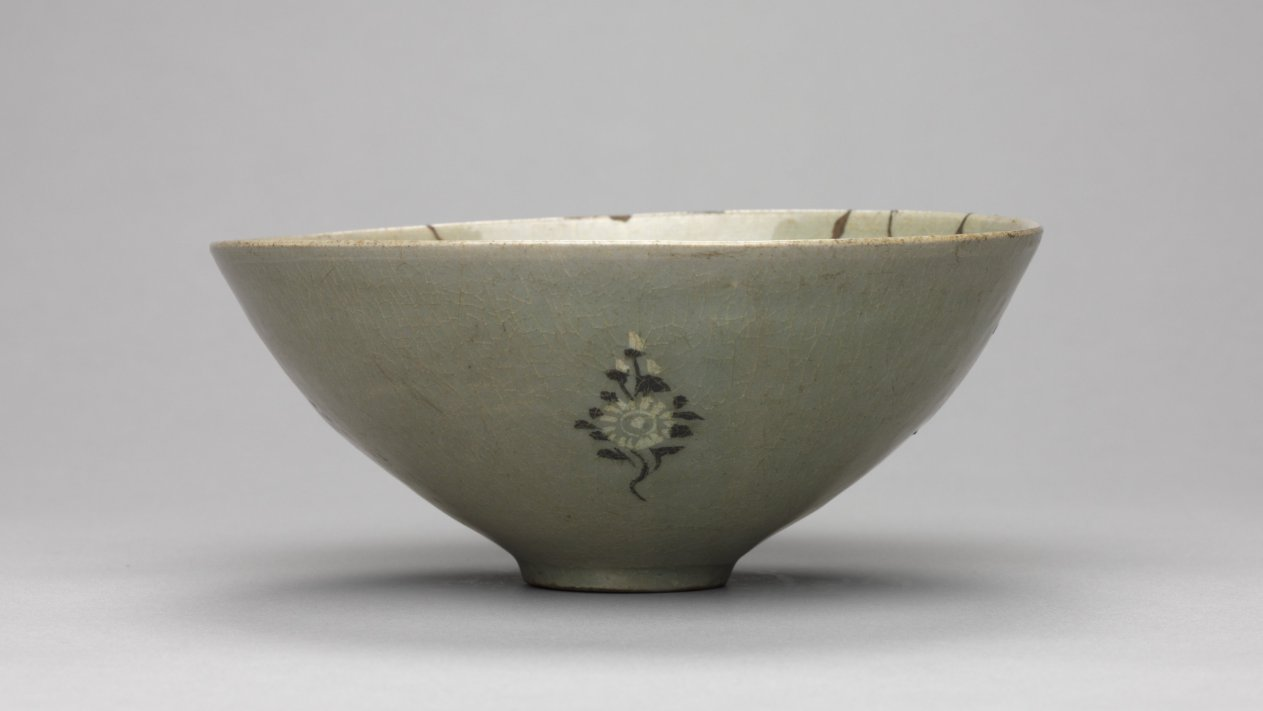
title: Bowl with Fish and Waves in Relief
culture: Korea, Goryeo dynasty (918–1392)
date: 1200s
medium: pottery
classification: Ceramic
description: As early as the 800s, the practice of drinking tea and wine became an important part of elite leisure culture in Korea. A wide bowl like this example was especially suitable for drinking powdered tea shaved from a compressed tea cake, the most commonly enjoyed type during the Goryeo period. While the inlaid image of bloomed chrysanthemums decorate the outer wall, that of fish swimming in waves in relief appear on the inner wall of this tea bowl. Such elaborate design tells us that tea wares then were aesthetically invested objects of luxury.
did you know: Kangjin and Buan kilns in Jeolla province were the two major production centers for celadon wares during the Goryeo period (918–1392).